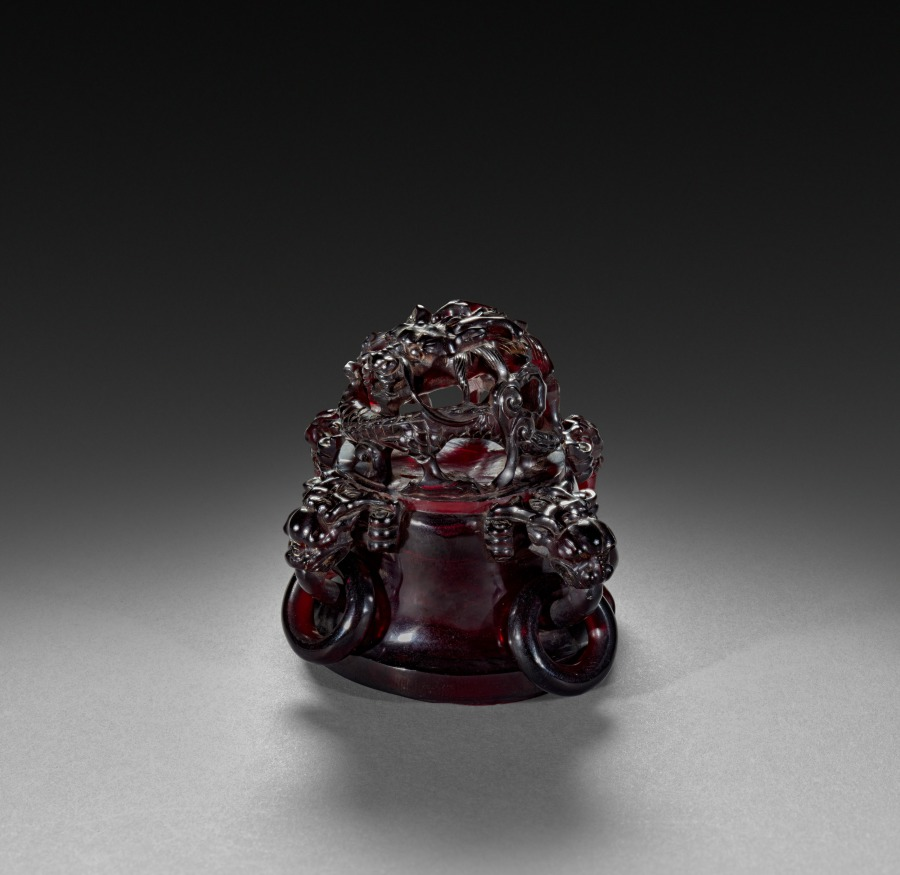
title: Vase (cover)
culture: China, Qing dynasty (1644–1911), Qianlong reign (1736–95)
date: 1736–95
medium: carved red amber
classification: Stone